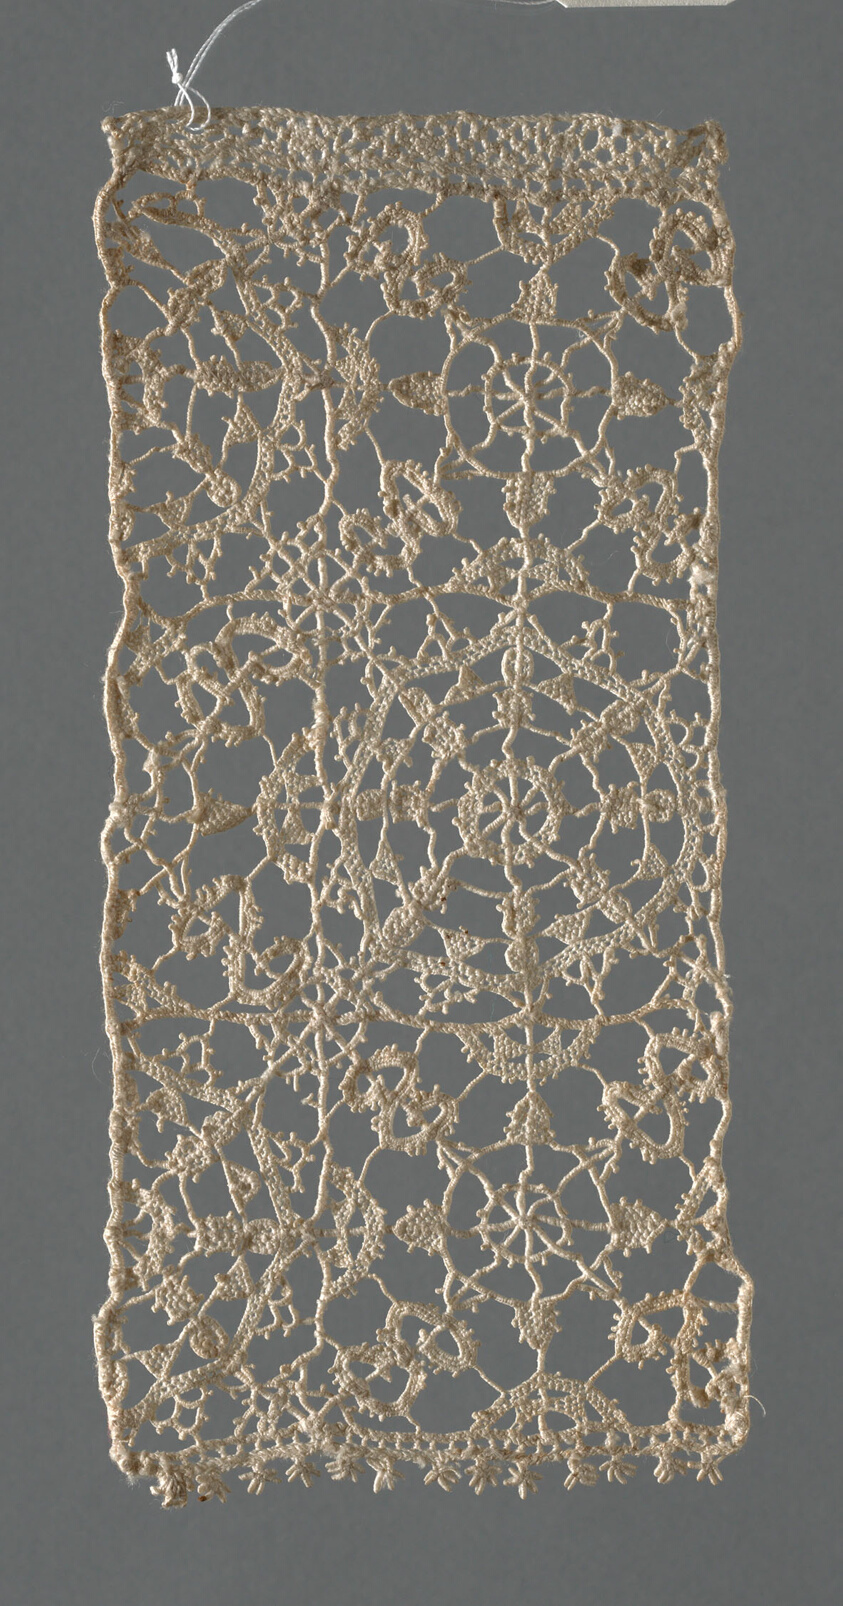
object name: Textile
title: Fragment (Border)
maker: Italy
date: 1601/25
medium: Linen, needle lace worked on a laid and plaited thread grid, Reticello pattern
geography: Italy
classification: textile; lace - needle